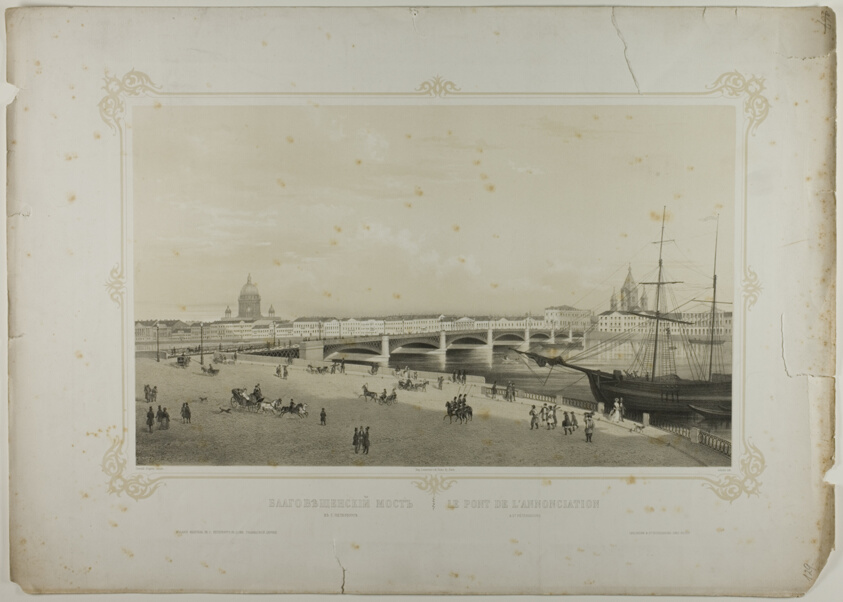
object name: Print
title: Annunciation Bridge in St. Petersburg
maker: C. Schultz (possibly German, active. c. 1820-1830); after Couradi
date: c. 1820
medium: Lithograph in black with fawn tint stone on ivory wove paper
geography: Germany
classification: lithograph; print; prints and drawing